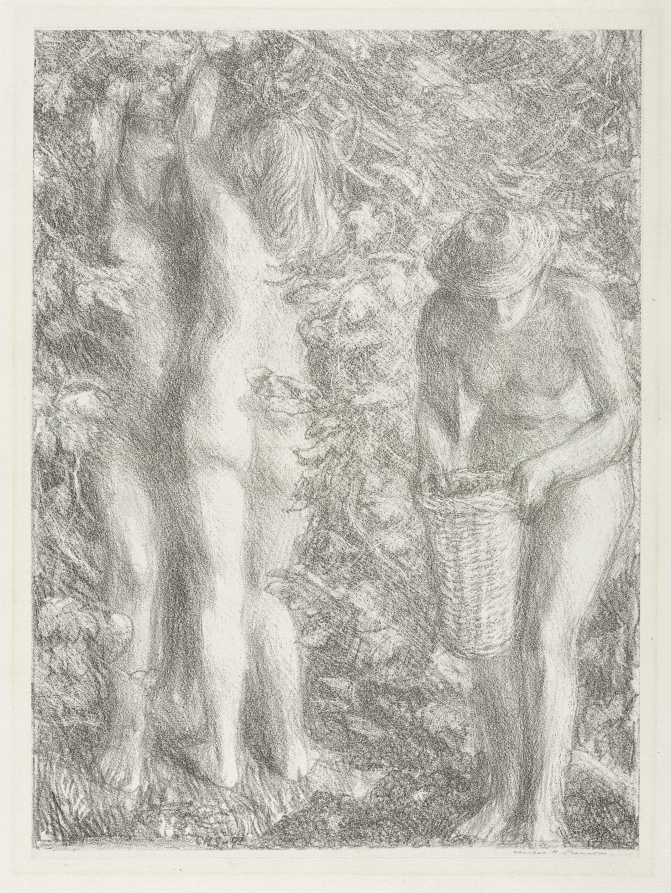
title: Summer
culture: England, 19th century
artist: Charles Hasslewood Shannon (British, 1863–1937)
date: 1892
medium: lithograph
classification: Print